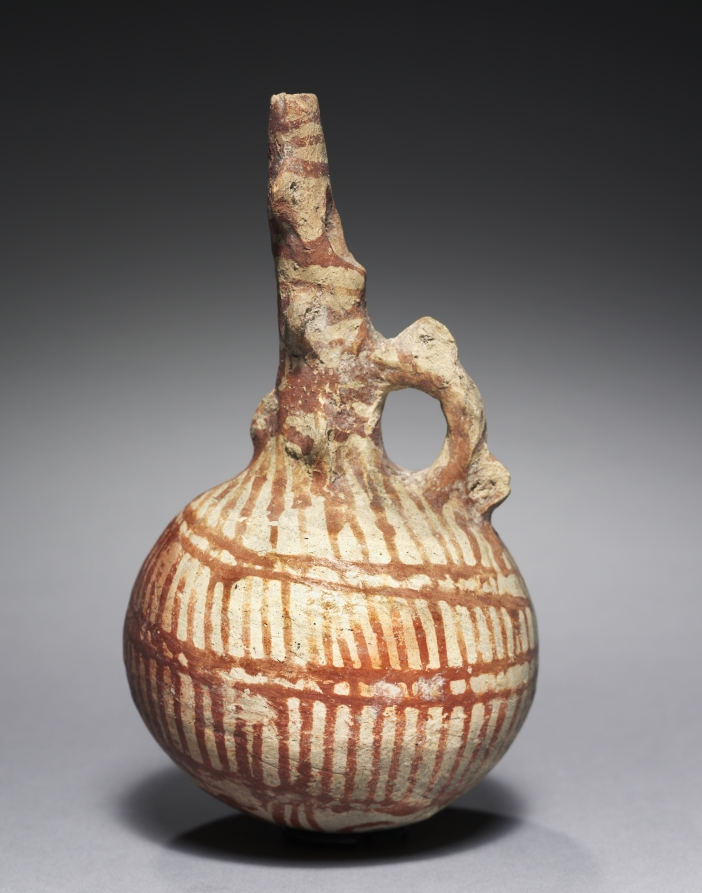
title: Jug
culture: Cyprus, middle Cypriot III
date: c. 1725–1600 BCE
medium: white painted ware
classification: Ceramic